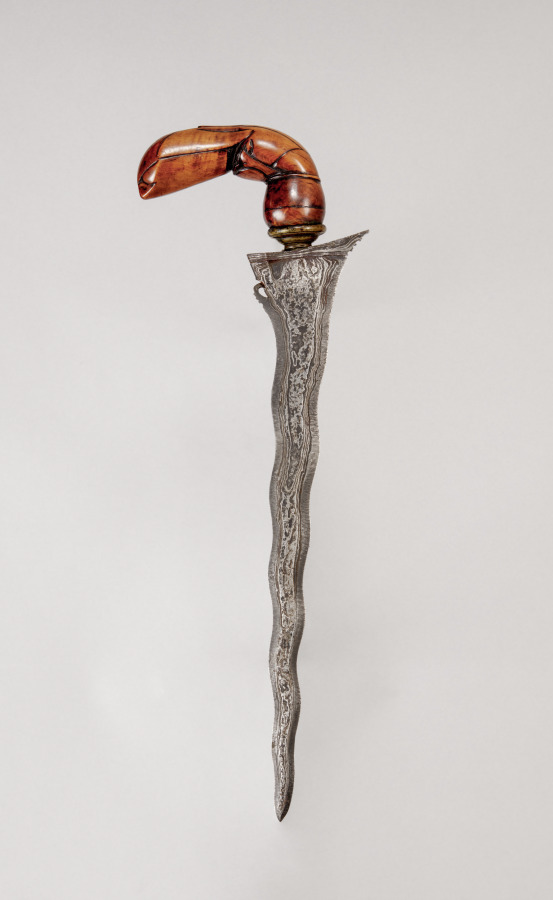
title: Sword (Kris)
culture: Java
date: 1800s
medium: iron with wooden handle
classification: Arms and Armor